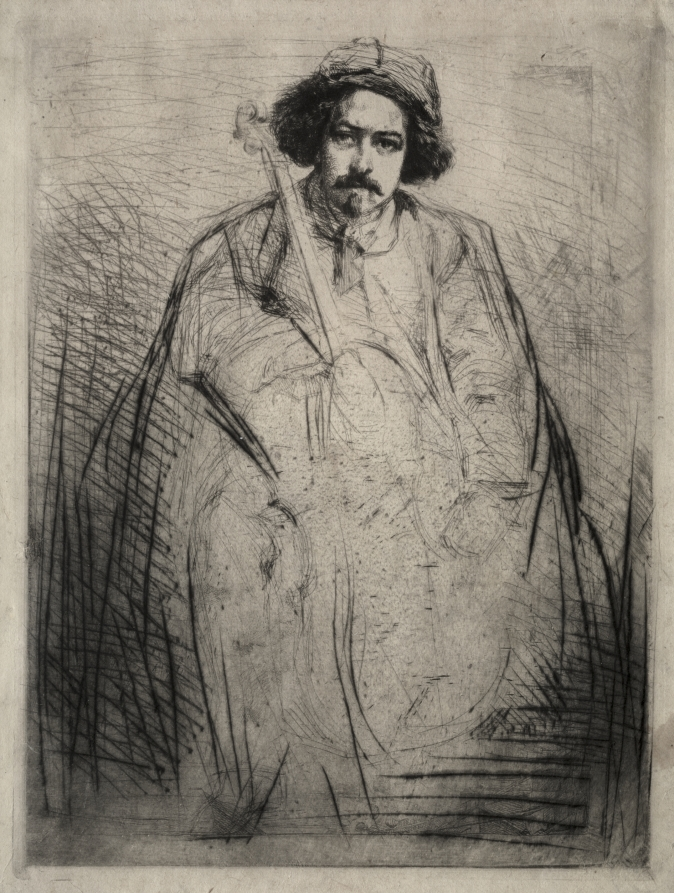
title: J. Becquet, Sculptor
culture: America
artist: James McNeill Whistler (American, 1834–1903)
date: 1859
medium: drypoint and etching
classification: Print